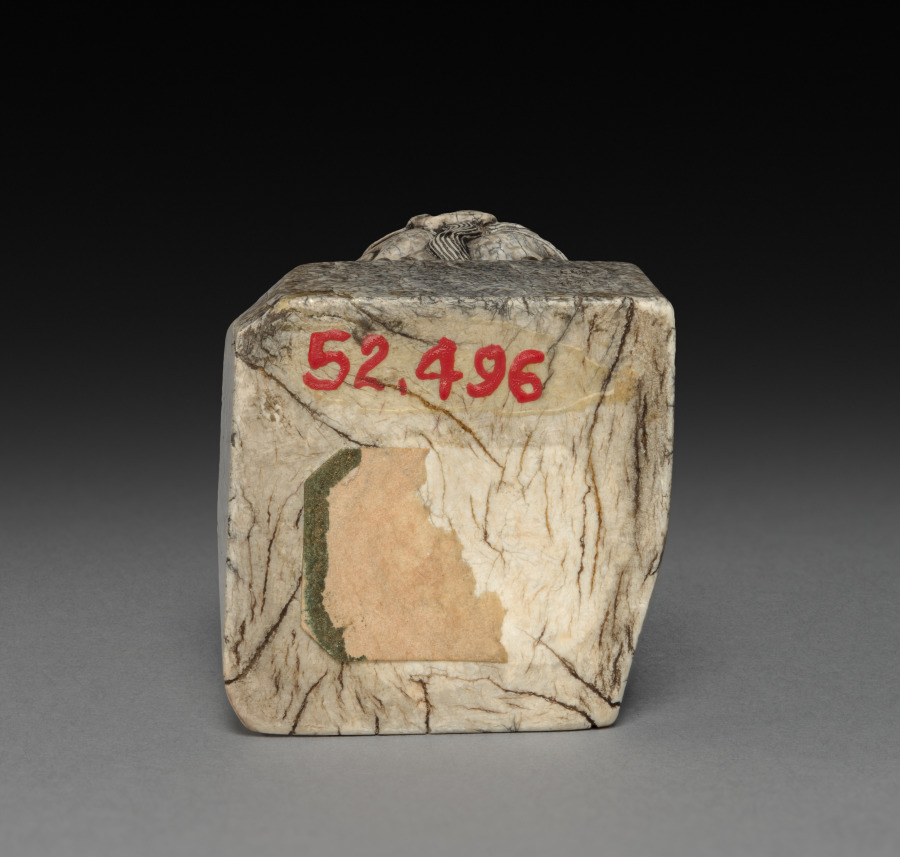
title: Seal: Lion and Cub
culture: China, Qing dynasty (1644-1911)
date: 1700s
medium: stone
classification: Stone